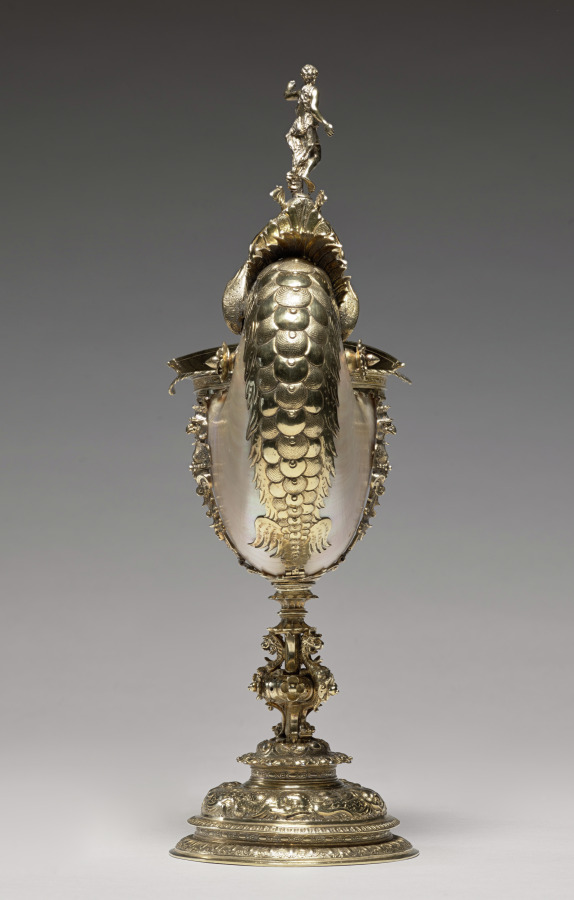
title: Nautilus Cup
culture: Netherlands, Holland, Delft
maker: Cornelis Jansz van der Burch (Dutch, active in Delft, d. 1615)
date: 1607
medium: Silver-gilt, nautilus shell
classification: Metalwork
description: Nautilus shells were brought to the Netherlands from Indonesia. Skilled Dutch silversmiths mounted them in silver, creating luxurious vessels that were sought after by wealthy collectors. Early Dutch nautilus cups are mainly associated with the city of Delft, although only a few other examples made in Delft are known from the late sixteenth and early seventeenth centuries. They feature the dramatic motif of a sea monster’s head.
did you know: The nautilus is a marine mollusk that swims by expelling water from its shell using jet propulsion.